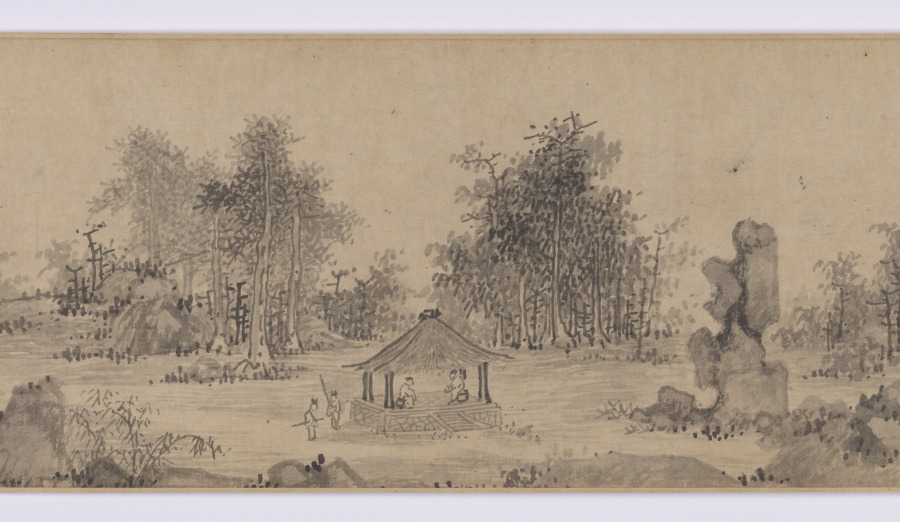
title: Poetic Feeling in a Thatched Pavilion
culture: China, Yuan dynasty (1271-1368)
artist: Wu Zhen (Chinese, 1280–1354)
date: 1347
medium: handscroll; ink on paper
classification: Painting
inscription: 依村構草亭，端方意匠宏。 林深禽鳥樂，塵遠竹松輕。 泉石俱延賞，琴書悅性情。 何當謝凡近，任適慰平生。 至正七年丁亥冬十月，為元澤戲作草亭詩意。梅沙彌書 [印]楳華盦; 嘉興吳鎮仲圭書畫記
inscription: 我愛梅花翁，巨老傳心印。 脩此水墨缘，種種得蒼潤。 樹石墮筆鋒，造化不能吝。 而今橡林下，我願執掃汛。 後學沈周 [印]启南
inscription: Colophon by Chen Rentao (1952): 予求梅道人畫二十年不可得。所見多膺鼎，即故宮所藏山水數軸都不可靠。傳世真迹，惟《漁父圖》、《嘉禾八景》與此《草亭詩意》而已。壬辰十月十四日余大病初愈，居家休養，研山師忽持此圖相贈。展卷披覽，頓覺精神沛振，如服僊藥。同日又得宋拓柳公權《神策軍紀聖德碑》，及群玉堂藏《真草書千(字)文》，皆海內孤本。一日得數寶，欣喜何如，書以志幸。 陳仁濤識 [印]陳氏仁濤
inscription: Colophon by Chen Rentao: 此圖作於至正七年丁亥，時年六十八，盖其晚年神品也。 濤又識 [印]陳仁濤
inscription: Title on frontispiece by Li Dongyang 李東陽 (1447-1516).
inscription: 33 additional seals: 1 seal of Li Chao-heng 李肇亨 (1592-1664)：檇李李肇亨書畫記; 9 seals of Liang Qingbiao 梁清標 (1620-1691): 蒼巖子、蕉林、蕉林梁氏書畫之印、蕉林秘玩、蕉林書屋、蕉林玉立氏圖書、棠邨 (appears twice)、棠邨審定; 1 seal of Wang Yirong (1845-1900): 懿榮; 3 seal of Li Yanshan (1898-1961): 雙銕笛樓 (appears twice)、硯山心賞; 12 seals of Chen Rentao 陳仁濤（1906-1968）：陳氏仁濤、陳仁濤珍藏印、金匱寶藏·陳氏仁濤 (appears three times)、金匱秘笈、金匱室、金匱室精鑒璽 (appears twice)、金匱室主、金匱神品、仁濤奇緣; 1 seal: 崐溟居士; 1 seal: 林止在㭯生圖書印; 3 seals unidentified.